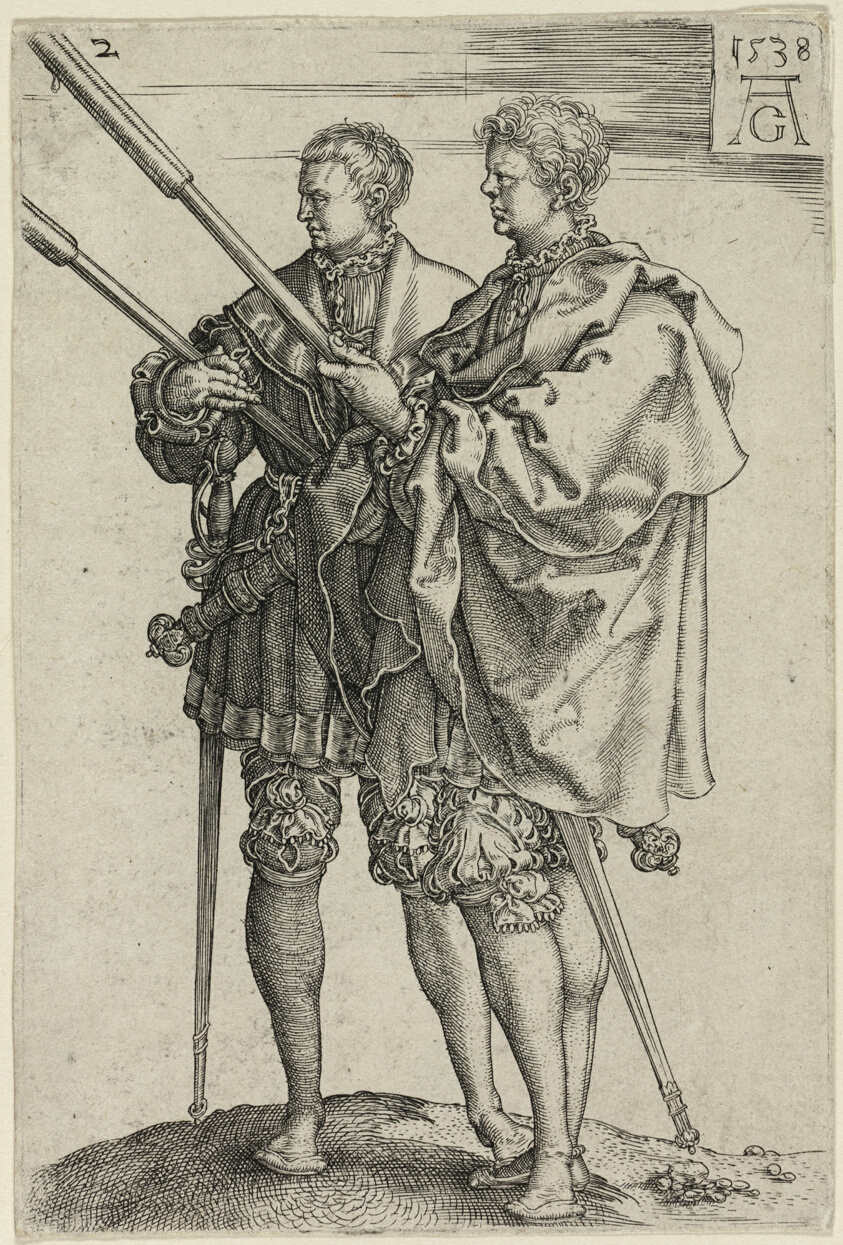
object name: Print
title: Two Torch-Bearers, plate two from The Large Wedding-Dancers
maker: Heinrich Aldegrever (German, 1502-c.1560)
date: 1538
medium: Engraving in black on ivory laid paper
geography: Germany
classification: engraving; print; prints and drawing